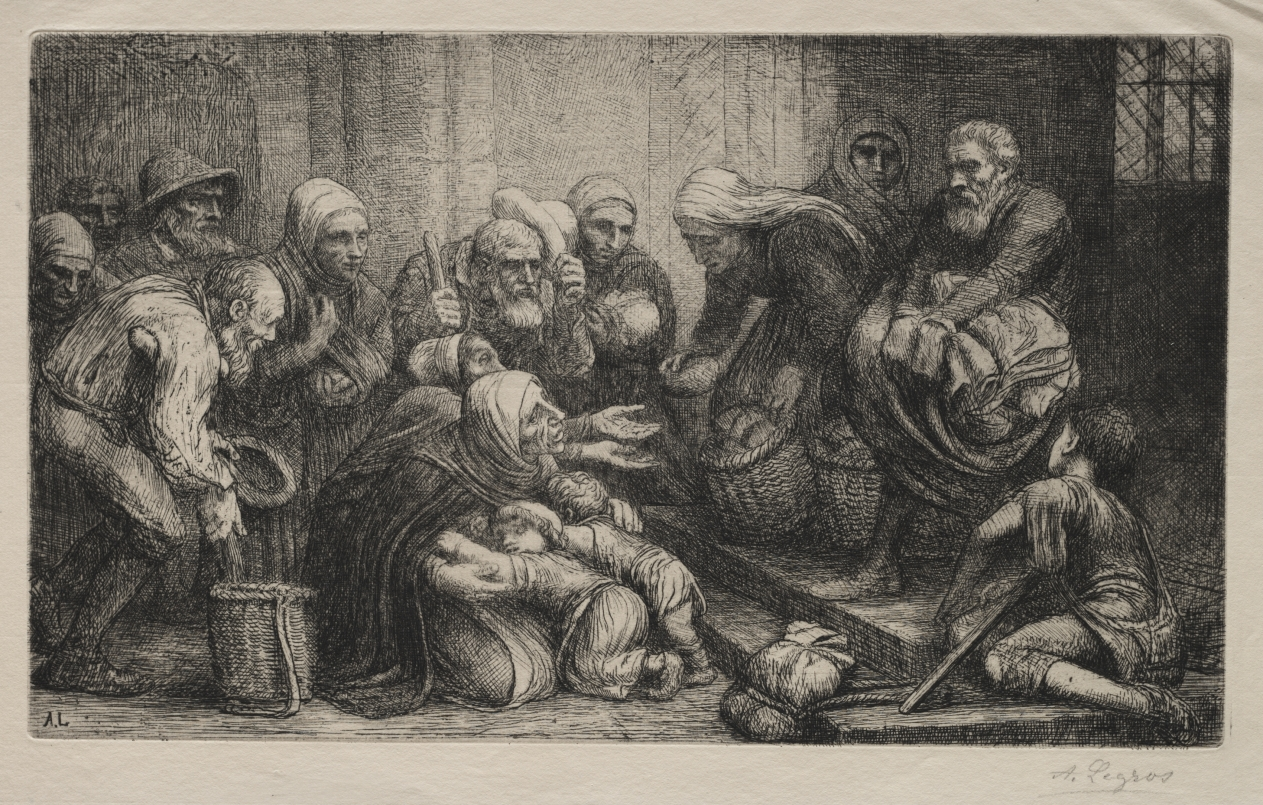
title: The Beggars of Bruges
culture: France, 19th-20th century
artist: Alphonse Legros (French, 1837–1911)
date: c. 1880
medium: etching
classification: Print